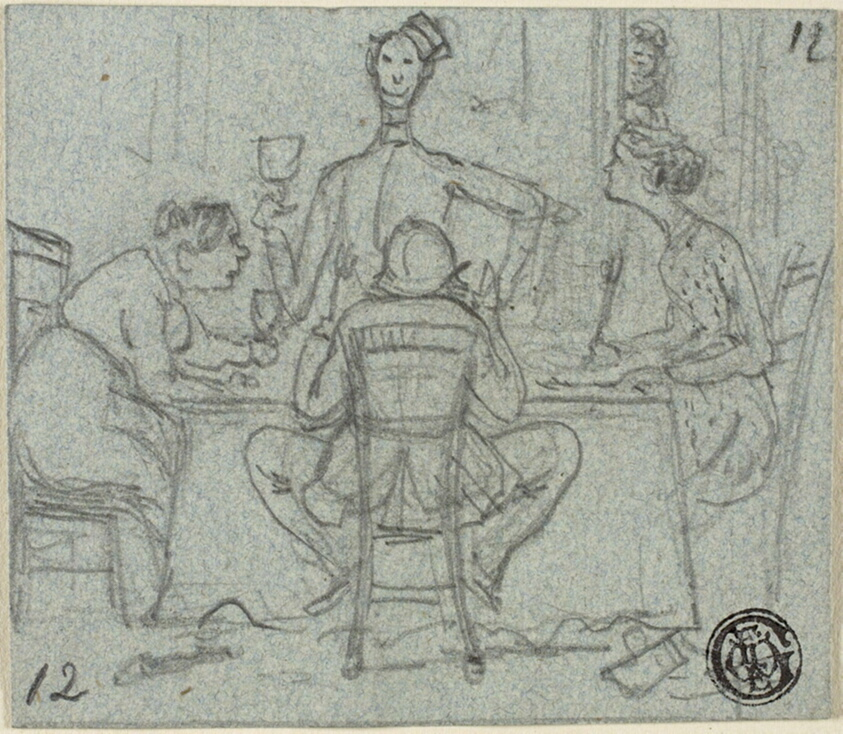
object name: Drawing and Watercolor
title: Episodes from White Chapel Life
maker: Attributed to John Leech; English, 1817-1864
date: c. 1850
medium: Graphite on blue wove paper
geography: England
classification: graphite; drawings (visual works); prints and drawing